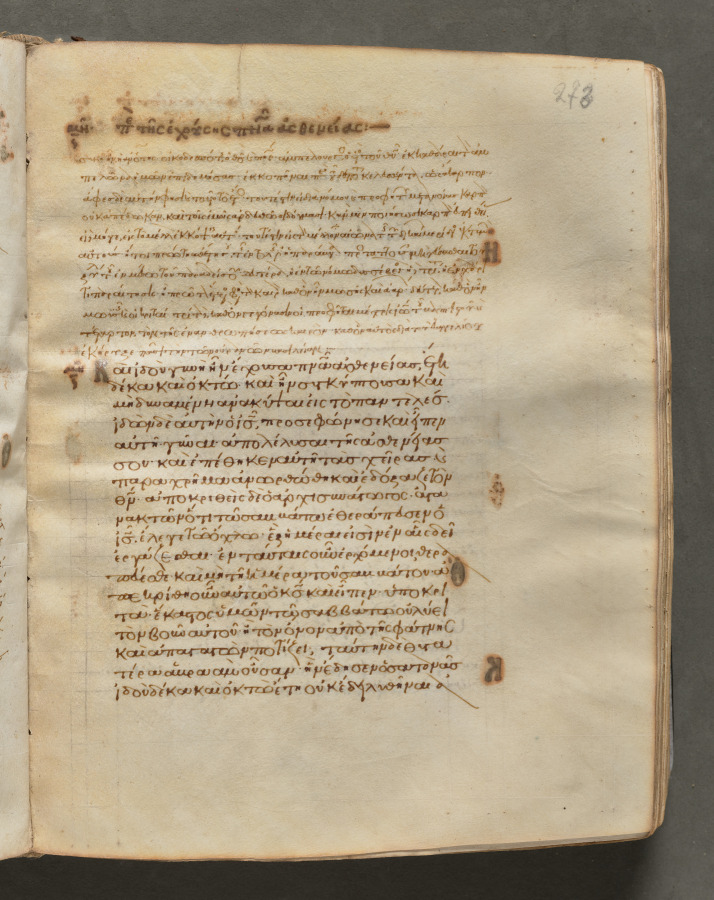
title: Text, folio 273 (recto), from a Gospel Book with Commentaries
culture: Byzantium, Constantinople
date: c. 1000–1100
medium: ink, tempera, and gold on vellum; leather binding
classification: Bound Volume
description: Each of the four gospels in this book opens on a page with brilliantly illuminated borders depicting the author of the text as well as birds—principally peacocks, symbols of the immortality of the soul—and fountains, representing the fountain of life and the salvation of the soul. This volume consists of 428 leaves with texts in Greek. Its level of sophistication suggests that it was probably written and decorated in a monastery in Constantinople.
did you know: Gospel books were carried in procession through Byzantine churches.